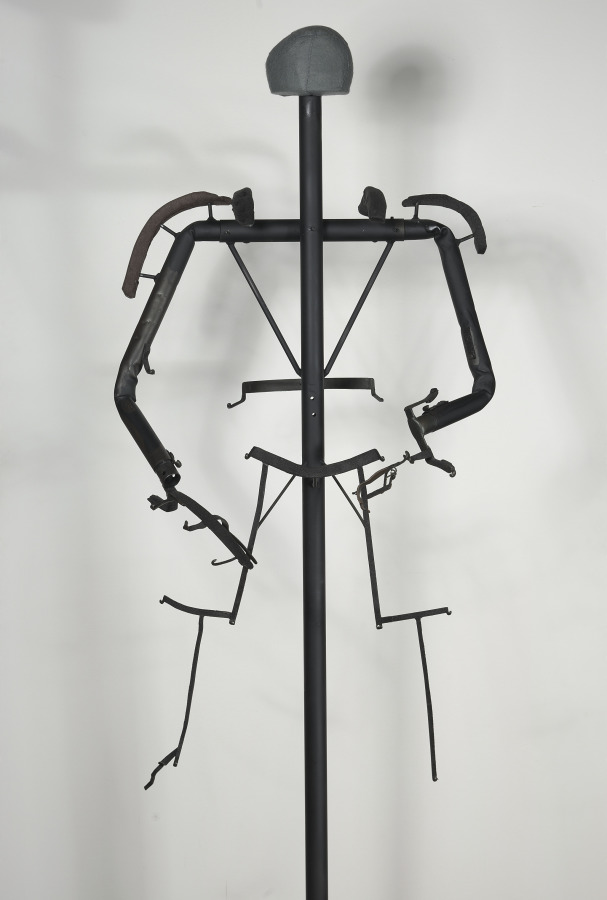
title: Cuirassier's Armor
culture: Austria, Graz(?), early 17th century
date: c. 1600–20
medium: steel (originally blued, now black); leather straps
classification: Arms and Armor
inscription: Proof mark (musket shot) is located on the proper left side of the breastplate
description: The cuirassier was the heavy cavalryman of the late 1500s and early 1600s. Carrying pistols and a sword, he was clad in full armor, like this suit, with the exception of his lower legs, which were protected by heavy riding boots. Shortly after 1650, such heavy cavalry armor disappeared from use. By then, European cavalries had abandoned full armor as impractical against the increased sophistication of firearms. Similar armors survive in the Armory of Graz, Austria.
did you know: This suit of armor is just over 5 1/2 feet tall.